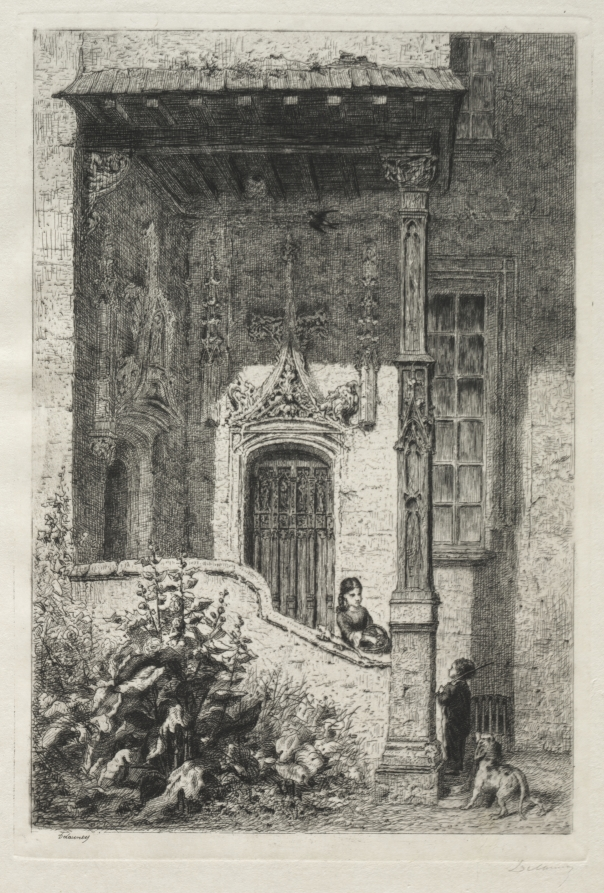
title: Maison dite de la Reine Blanche, Rue St. Hippolyte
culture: France, 19th century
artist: Alfred Alexandre Delauney (French, 1830–1894)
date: c. 1870–94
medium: etching and drypoint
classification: Print